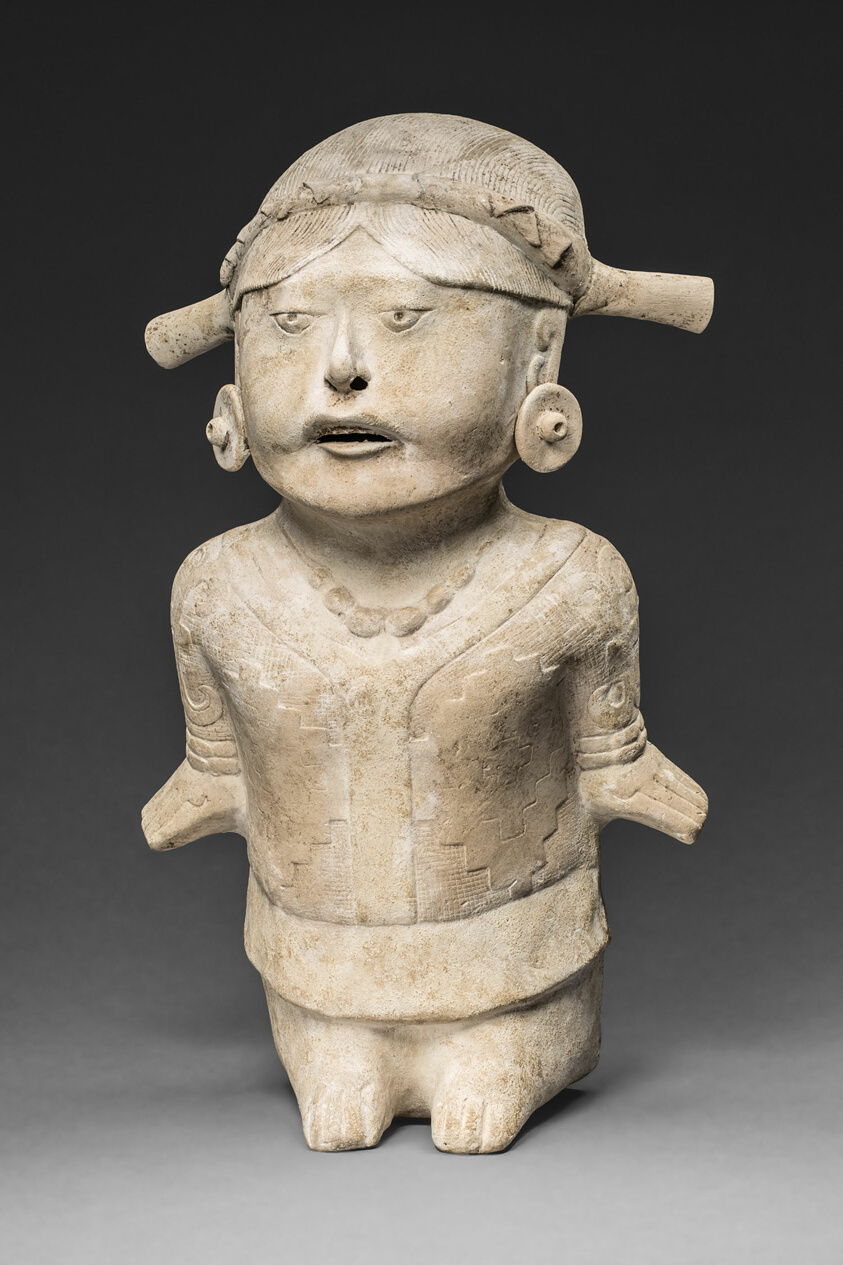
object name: Sculpture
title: Figure of a Woman in Ceremonial Dress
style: Nōpiloa, late classic, classic, mesoamerican, Pre-Columbian, americas, classic veracruz, totonac, Arts of the Americas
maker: Possibly Totonac, Nopiloa; Veracruz, south-central Gulf Coast, Mexico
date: 700–900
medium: Ceramic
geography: Southern Veracruz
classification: earthenware; ceramics; sculpture; art of the americas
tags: people, textile pattern, female, costume